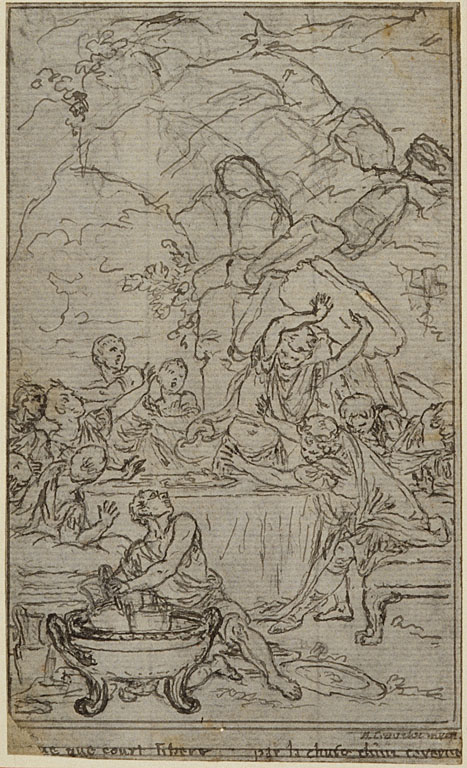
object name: Drawing and Watercolor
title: Study for an illustration in Tacitus "Tibère, ou Les Six Premiers Livres des Annales", Book IV, Vol. 2, 2nd Study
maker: Hubert François Gravelot (French, 1699-1773)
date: c. 1768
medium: Pen and black ink, over graphite, on gray laid paper, incised for transfer and perimeter mounted on ivory laid paper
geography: France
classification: pen and ink drawings; drawings (visual works); prints and drawing